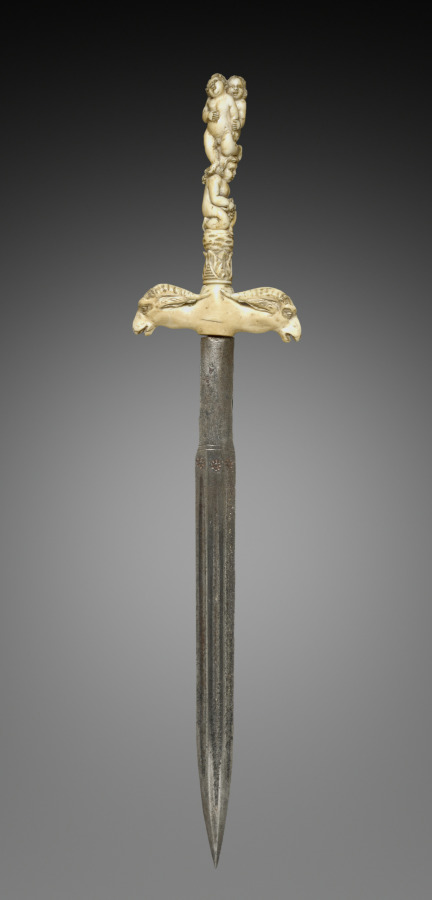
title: Dagger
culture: Italy, late 17th Century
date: late 1600s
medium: steel and ivory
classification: Arms and Armor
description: The carved grip of this dagger depicts the female followers of Bacchus, the Roman god of wine.